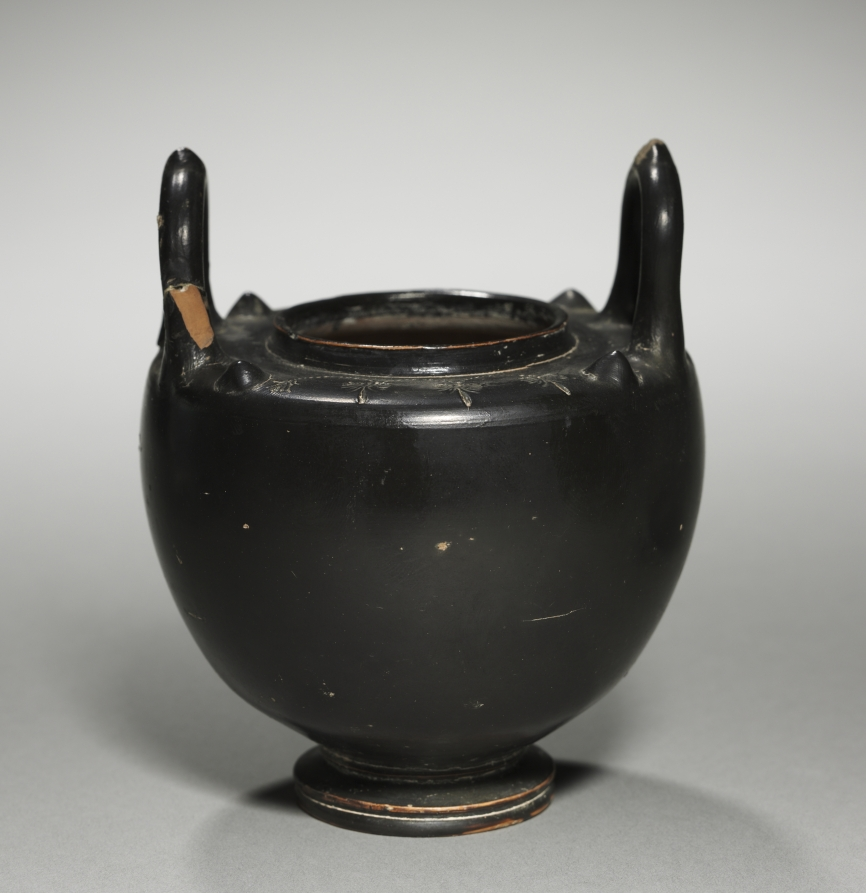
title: Black-Gloss Lebes Gamikos (Nuptial Bowl)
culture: Greek or South Italian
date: c. 425–375 BCE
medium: ceramic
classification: Ceramic